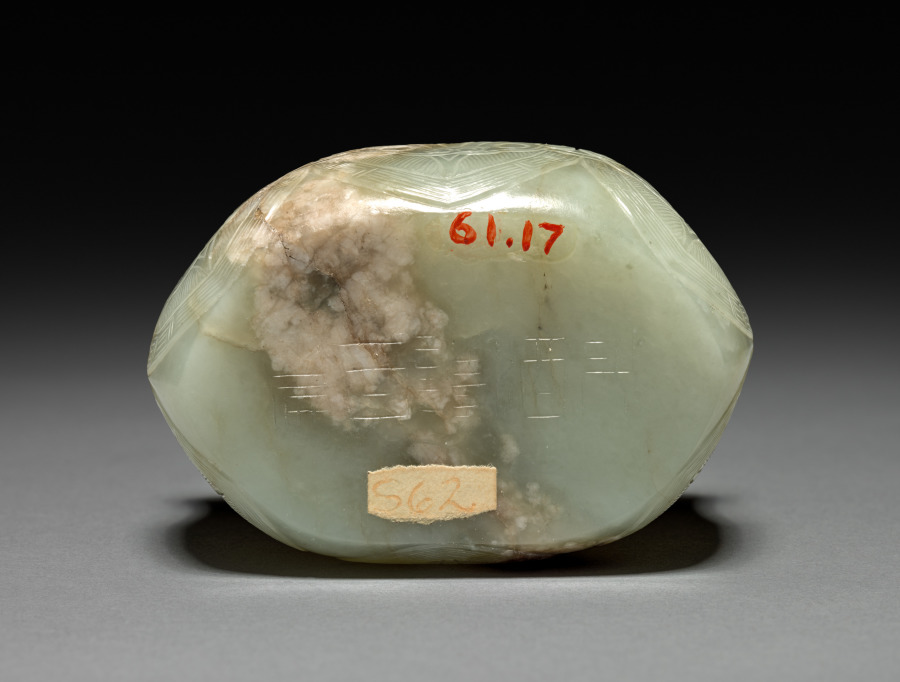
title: Cup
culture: China, Song dynasty (960-1279)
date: 960– 1279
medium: jade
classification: Jade